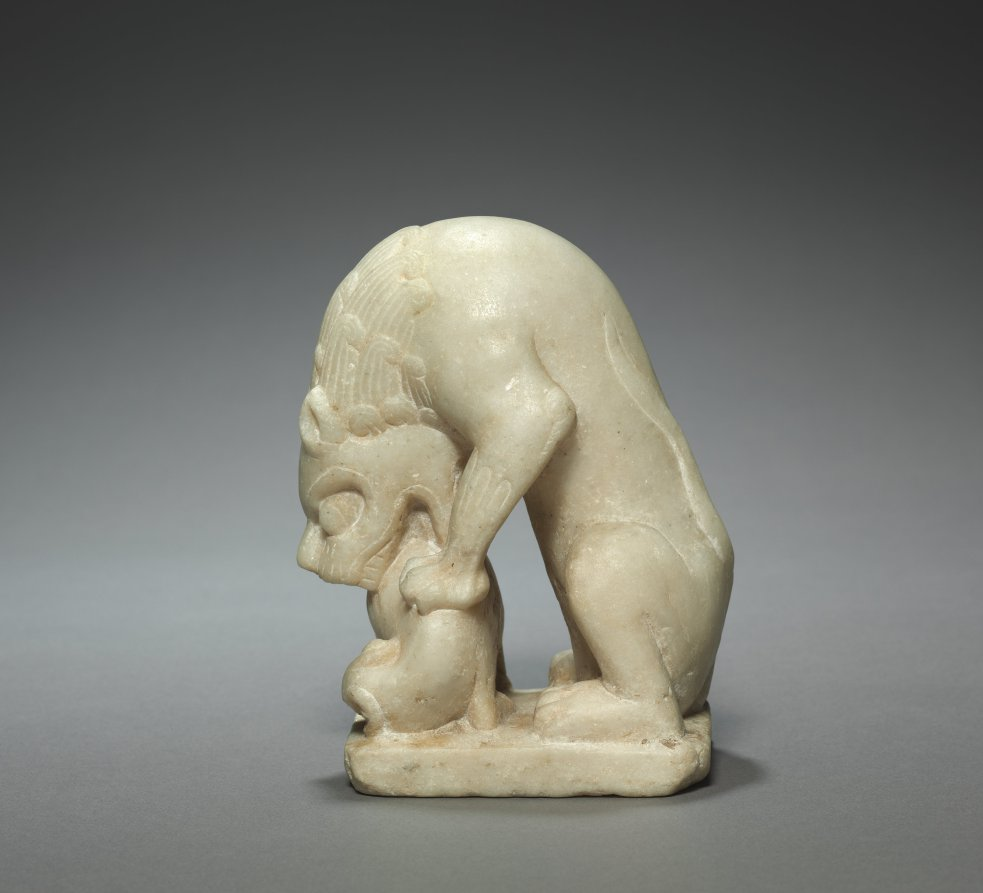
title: Lion Devouring a Lamb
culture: North China, Tang dynasty (618-907)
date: early 700s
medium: white marble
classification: Sculpture